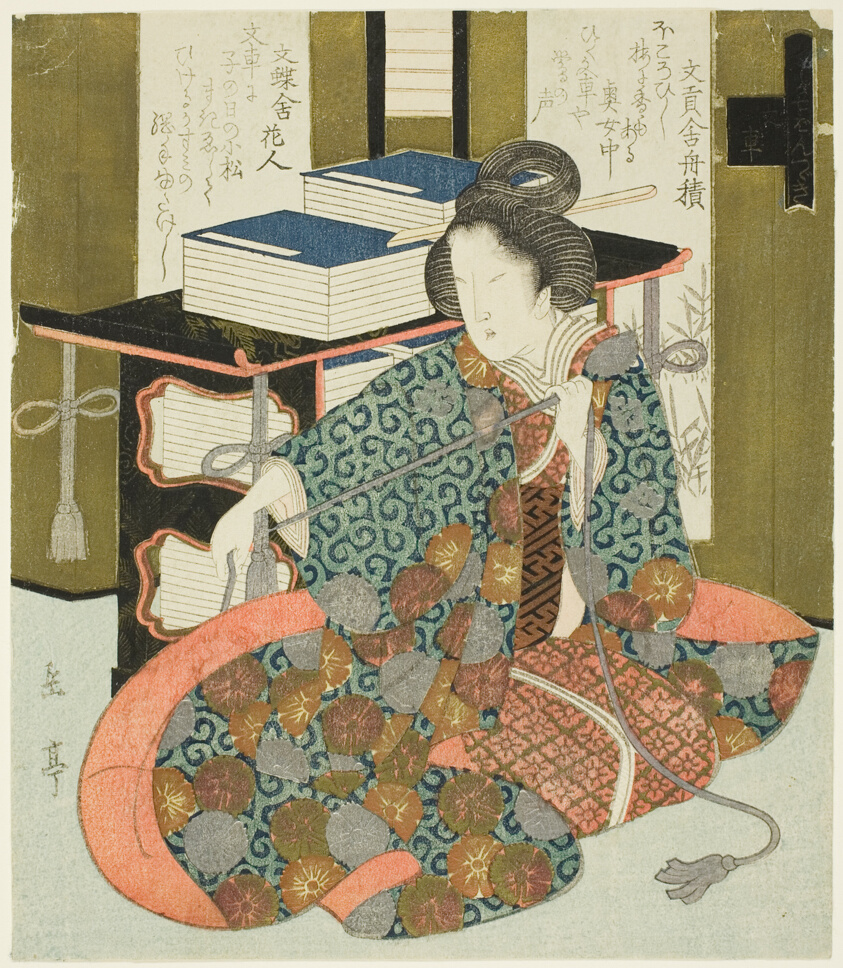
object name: Print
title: A Woman Pulling the Cord of a Wheeled Book Case, from the series "A Set of Seven for the Katsushika Club"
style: Japanese (culture or style)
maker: Yashima Gakutei (Japanese, 1786 (?)-1868)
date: c. 1825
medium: Color woodblock print with metallic pigments; surimono shikishiban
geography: Japan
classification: woodblock print; print; asian art